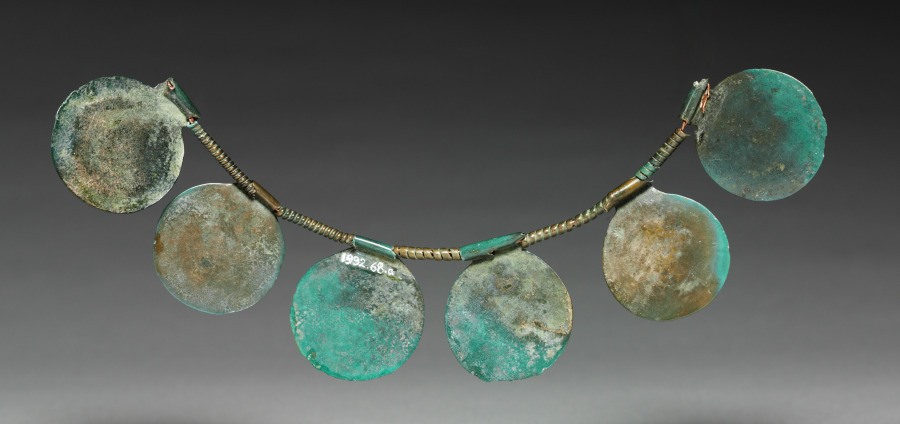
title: Elements from a Necklace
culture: possibly Hungary, Bronze Age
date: c. 1400–1300 BCE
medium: bronze, cast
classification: Jewelry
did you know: The cast bronze necklace pendants are partially oxidized, revealing a green patina.